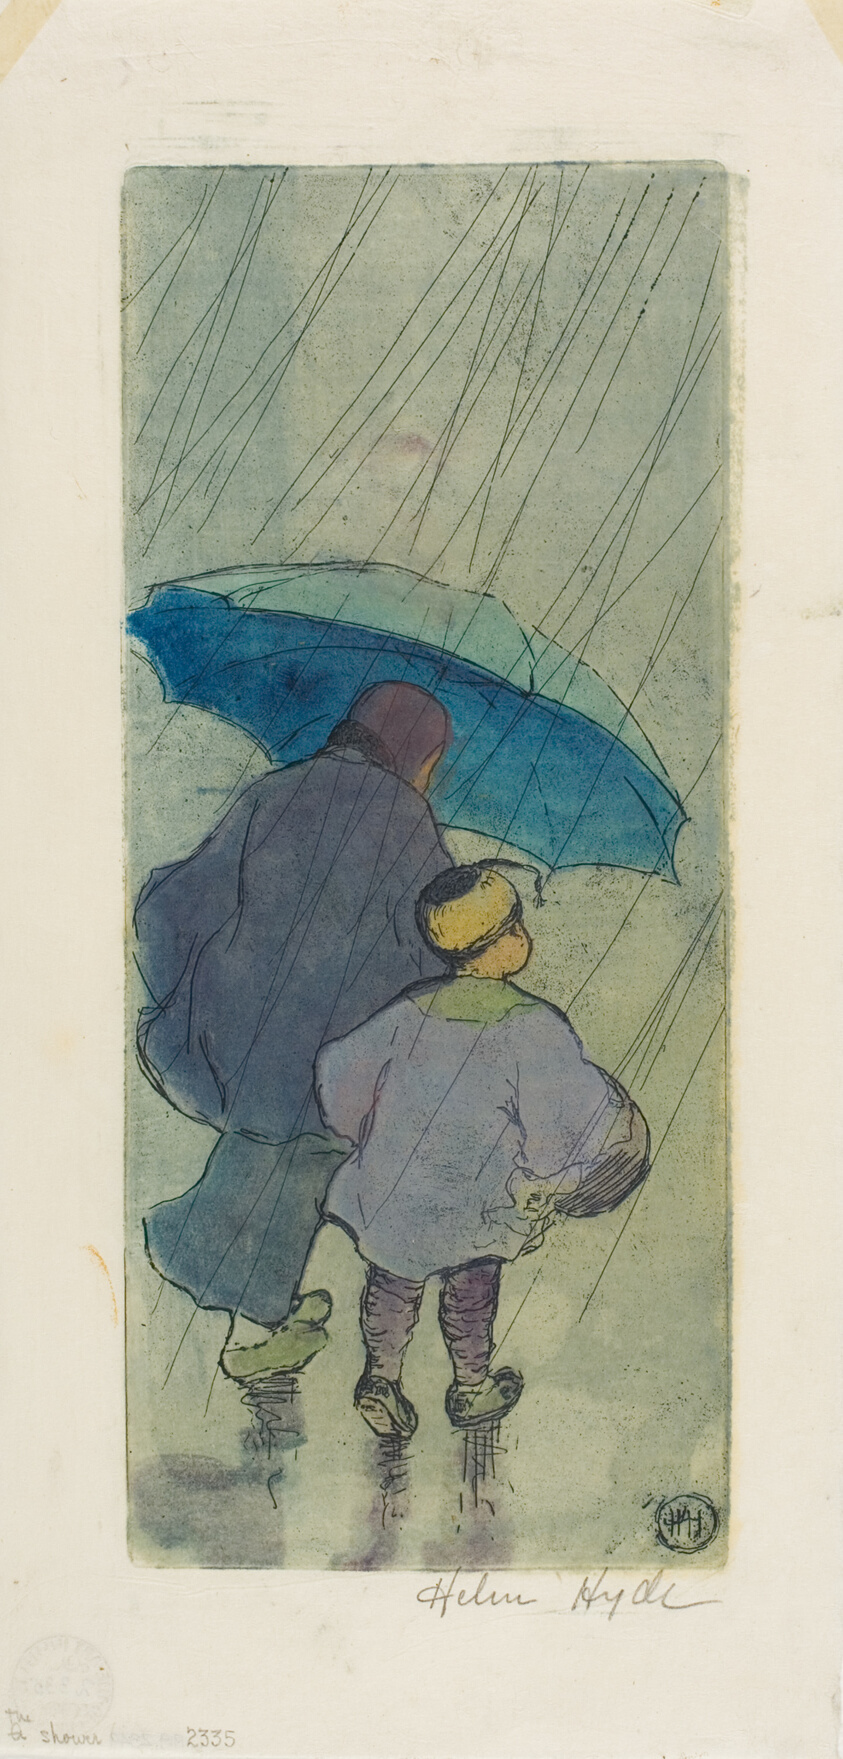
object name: Print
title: The Shower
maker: Helen Hyde (American, 1868-1919)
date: 1897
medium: Color etching on paper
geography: United States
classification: etching; print; prints and drawing